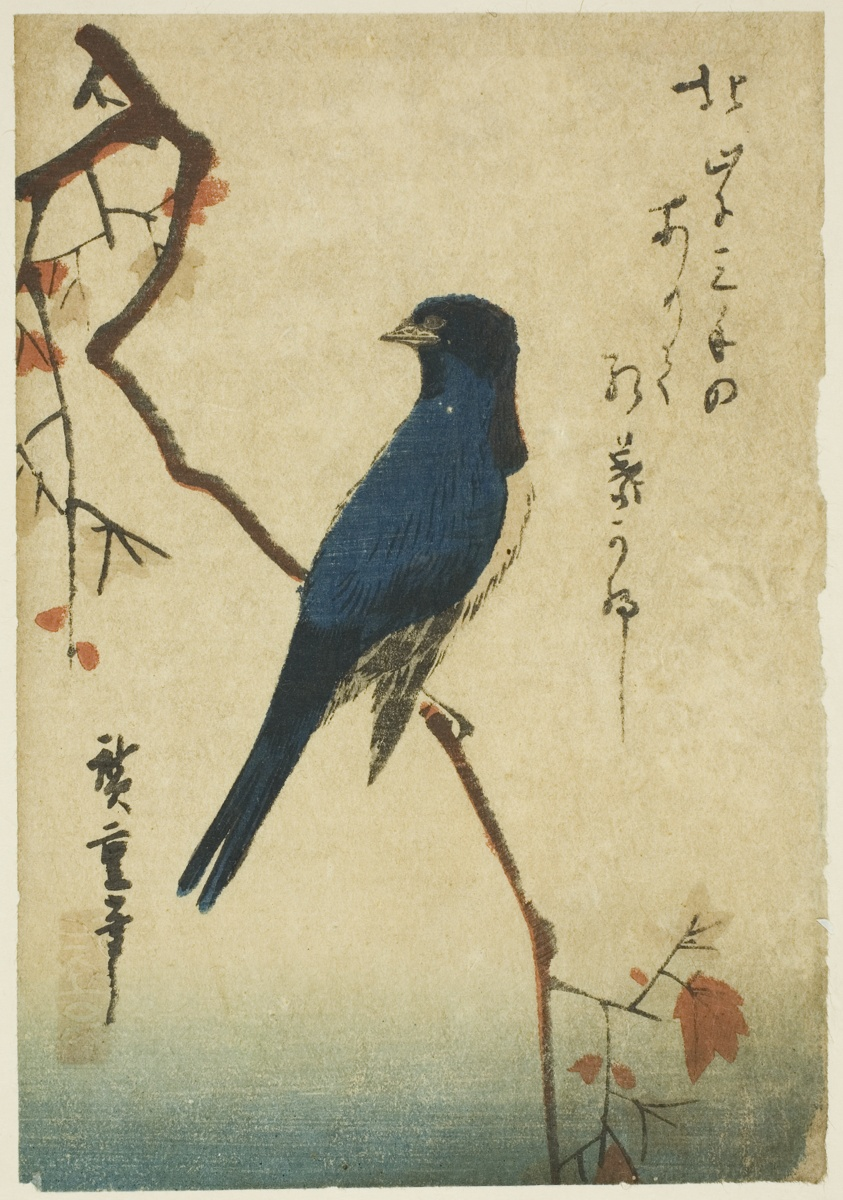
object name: Print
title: Blue bird on maple branch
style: Japanese (culture or style)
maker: Utagawa Hiroshige 歌川 広重; Japanese, 1797-1858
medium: Color woodblock print; yotsugiriban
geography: Japan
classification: woodblock print; print; asian art